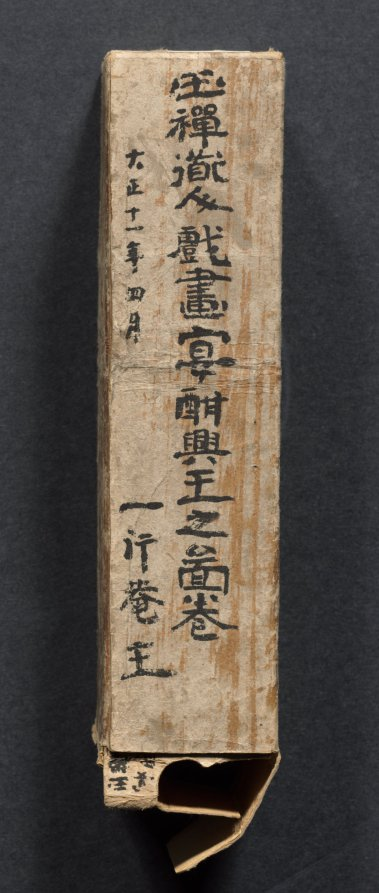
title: The Shadow Dancers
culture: Japan, Edo period (1615–1868)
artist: Yamamoto Baiitsu (Japanese, 1783–1856)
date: 1800s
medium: handscroll, ink and color on silk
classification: Painting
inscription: artist's signature and two seals at end of painting.